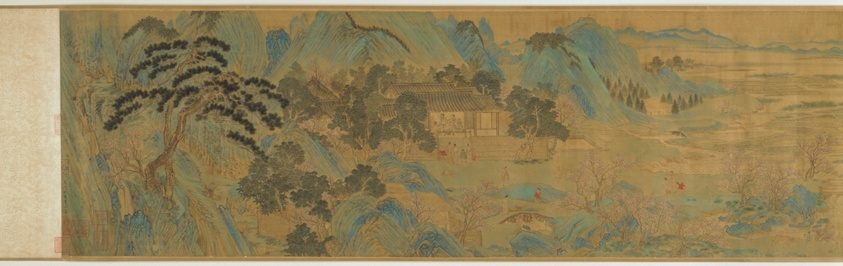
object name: Painting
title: The Peach Blossom Spring 桃花源圖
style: Chinese (culture or style)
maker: Artist unknown (17th century), spurious signature of Qiu Ying 仇英 (c. 1500-1552); Chinese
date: Late Ming (1368–1644) or early Qing (1644–1912) dynasty 明朝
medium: Handscroll; ink and color on silk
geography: China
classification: handscroll; painting; asian art